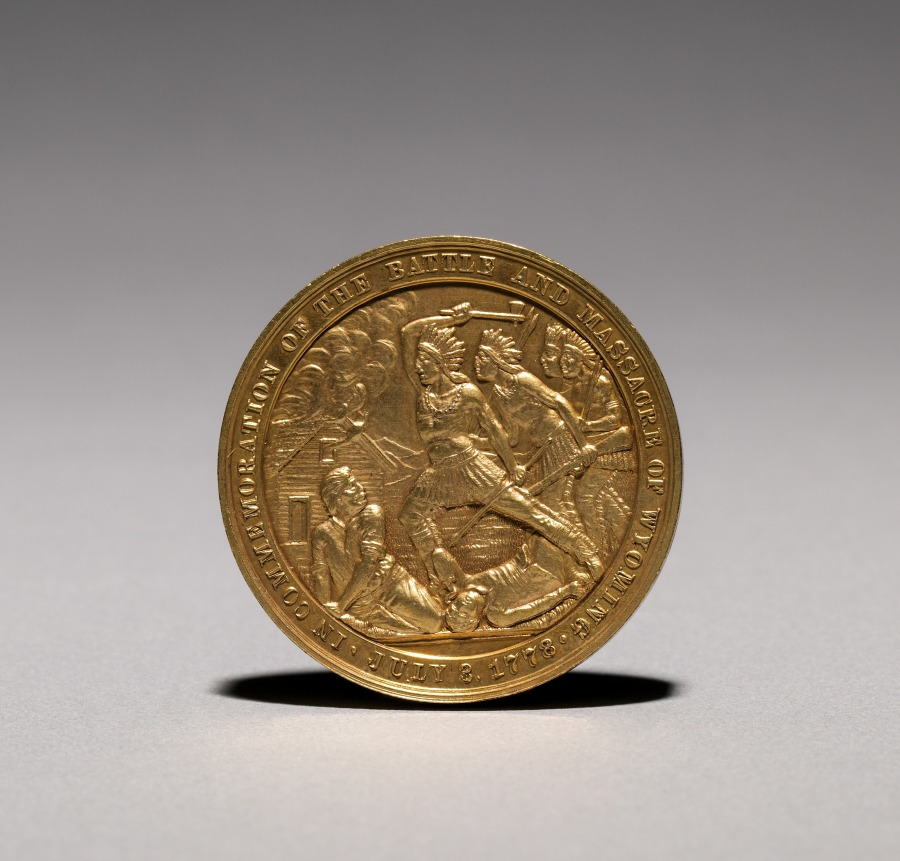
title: Medal: In Commemoration of the Battle and Massacre of Wyoming, 3 July 1778 (obverse)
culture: America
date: 1878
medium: gilt bronze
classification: Metalwork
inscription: In commemoration of the battle and massacre of Wyoming, July 3, 1777.